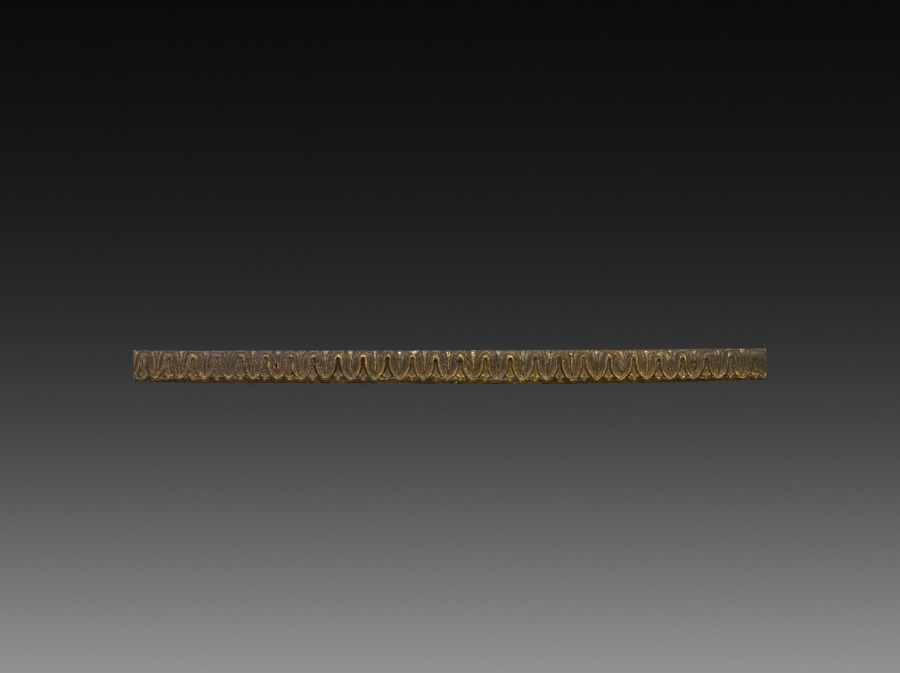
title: Ornamental Detail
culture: France, late 18th century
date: late 1700s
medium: gilt bronze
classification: Metalwork